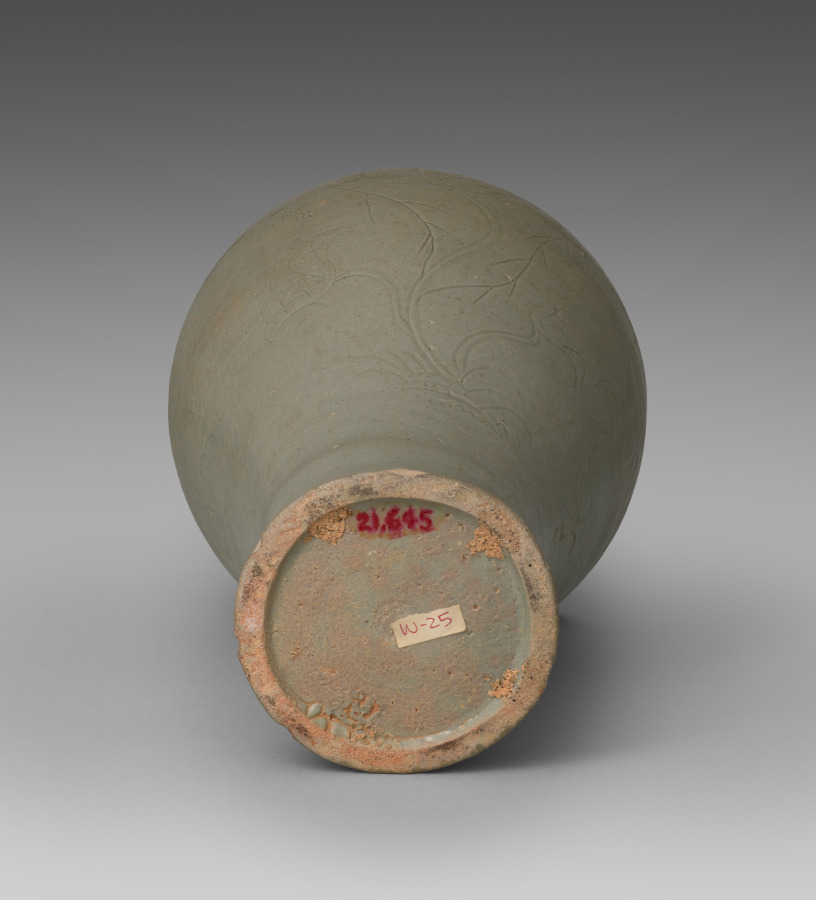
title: Prunus Vase with Incised Peony Design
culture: Korea, Goryeo dynasty (918–1392)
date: 1100s-1200s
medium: celadon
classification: Ceramic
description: As early as the seventh century, the practice of drinking tea and wine became an important part of elite culture in Korea. Once used to store alcoholic beverages, this type of vase features a wide body followed by a sharply rounded shoulder, a short neck and a small opening. Most of the remaining examples no longer have a lid, but originally it may have had a lid that not only covered the opening, but also served as a cup.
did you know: Prunus vases are often believed to contain a branch of plum blossoms, but recent researches reveal that these vases with a lid also were used to contain cooking liquid such as sesame oil.